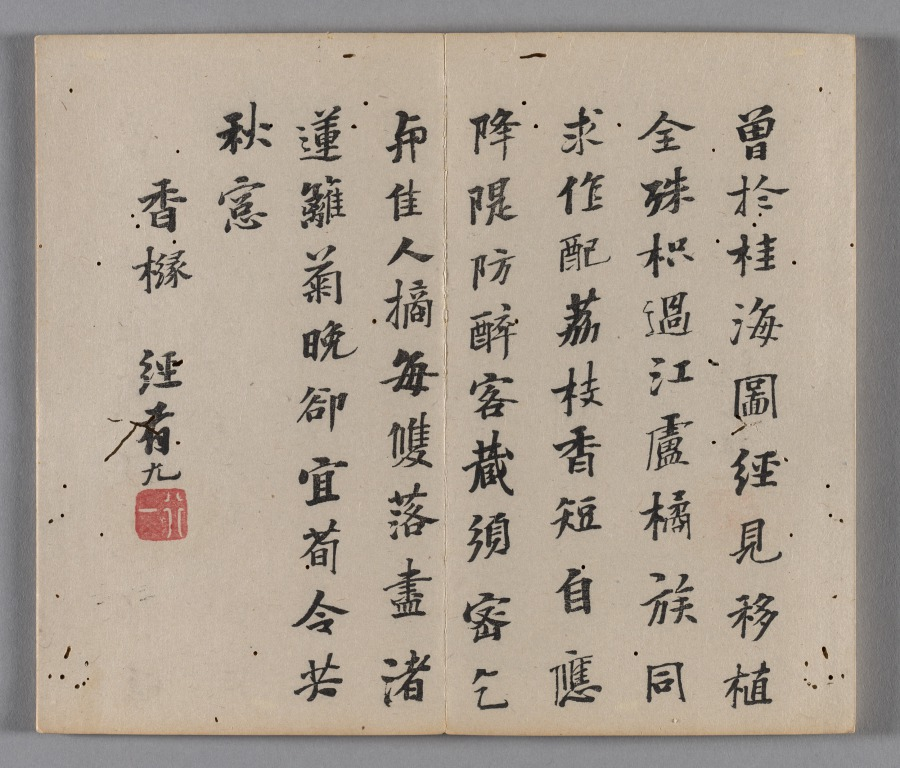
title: Ten Bamboo Studio Painting and Calligraphy Handbook (Shizhuzhai shuhua pu): Fruit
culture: China, Qing dynasty (1644-1911)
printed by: Hu Zhengyan (Chinese, c. 1584–1674)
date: 1633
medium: Woodblock-printed book; ink and colors on paper; first edition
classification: Print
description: Color printing reached a level of perfection in the early 1600s, as seen in this Ten Bamboo Studio Collection of Calligraphy and Painting and the Mustard Seed Garden Manual of Painting (printed 1679 and 1701). The painterly quality, precision in registering (aligning) the woodblocks, and harmonious colors made them the most successful color print editions in Chinese history. Both editions were printed and compiled in Nanjing, spread nationwide, and had a great impact on the arts in Japan and Korea.